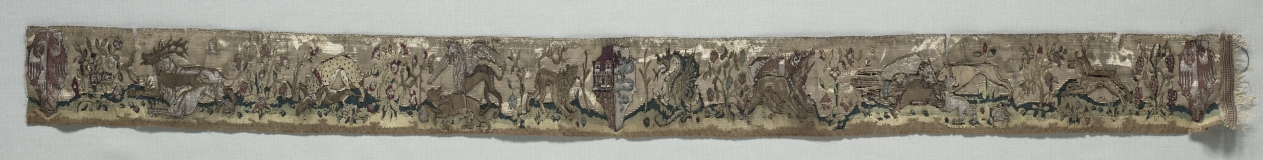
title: Tapestry Border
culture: Italy, Lombardy, Milan ?, first half of 15th century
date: 1400–1450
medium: tapestry weave; silk, silver and gold wire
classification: Tapestry